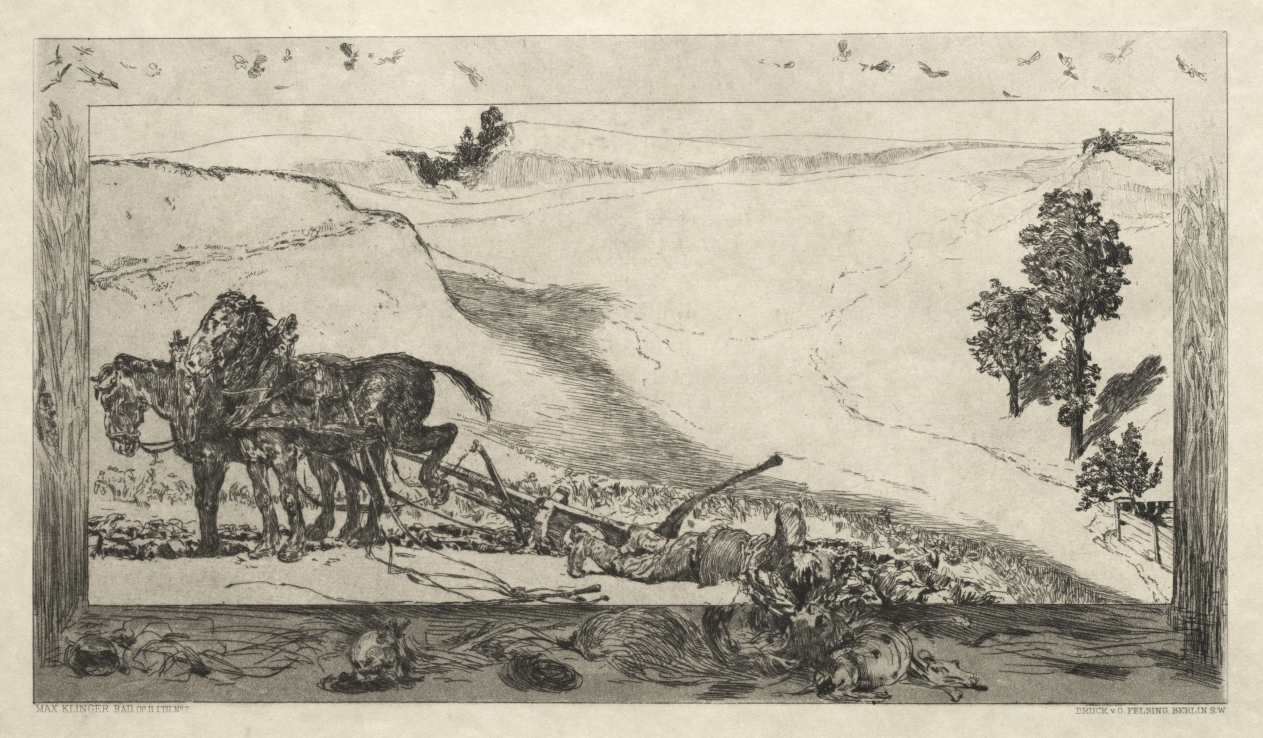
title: Vom Tode I (Opus II, 1889) No. 7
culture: Germany, late 19th century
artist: Max Klinger (German, 1857–1920)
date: 1889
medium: etching and aquatint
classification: Print